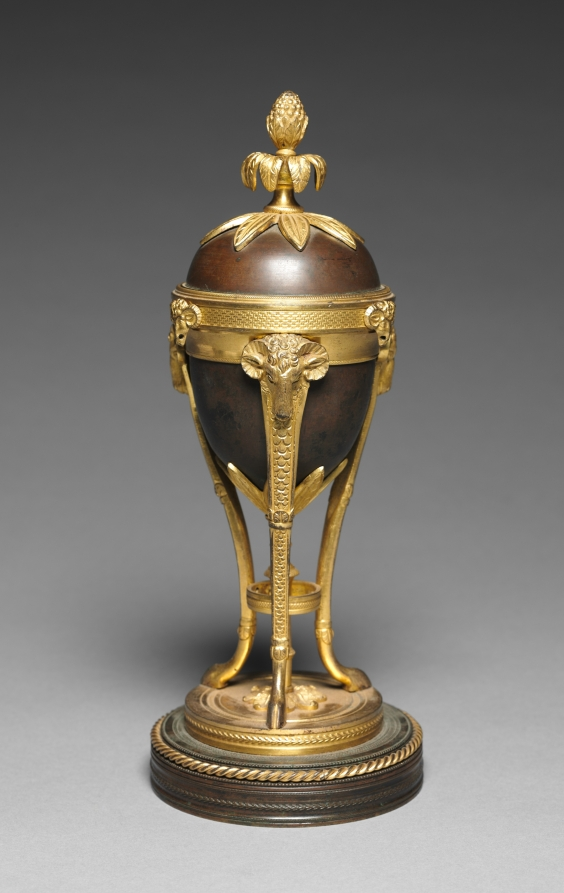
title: Urn Convertible into Candle Stick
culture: England, late 18th century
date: late 1700s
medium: dark bronze, mounts in ormolu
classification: Furniture and woodwork